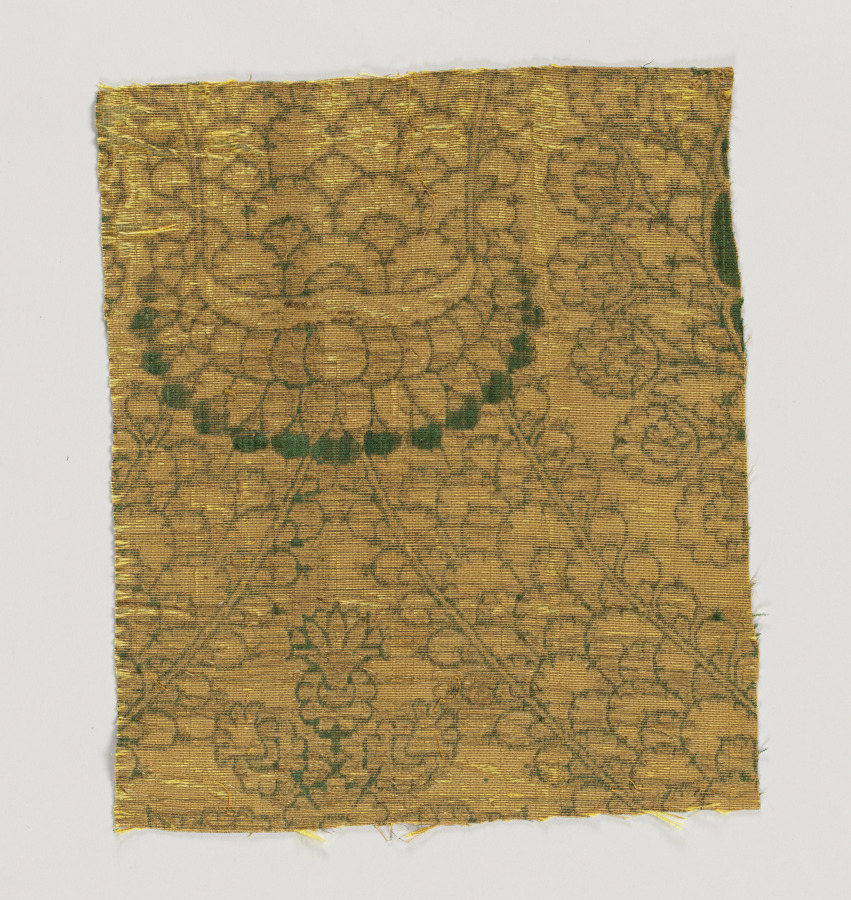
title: Velvet Fragments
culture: Spain, early 16th century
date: early 16th century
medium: velvet (cut, voided, and brocaded): silk and gold thread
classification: Velvet